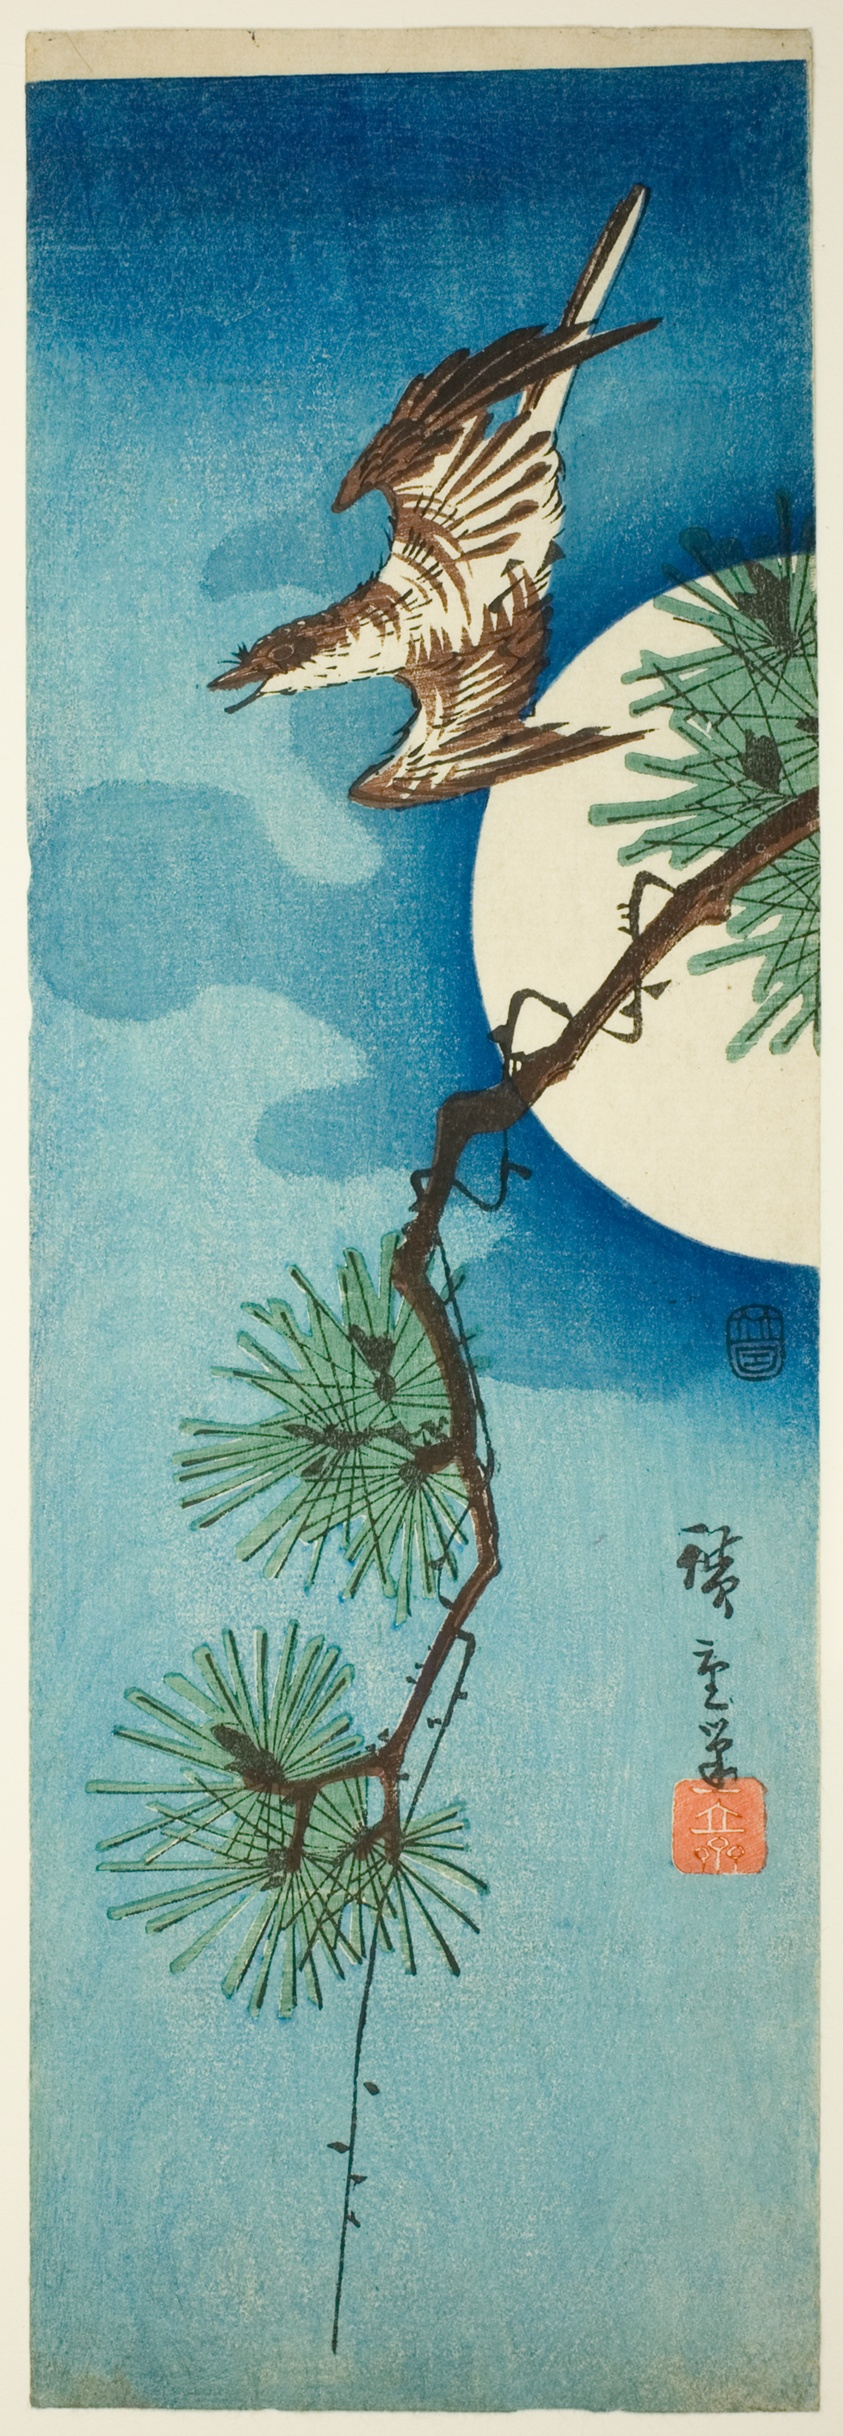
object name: Print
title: Cuckoo, pine branch, and full moon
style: Japanese (culture or style)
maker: Utagawa Hiroshige 歌川 広重; Japanese, 1797-1858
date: c. 1843/47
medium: Color woodblock print; aitanzaku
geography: Japan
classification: woodblock print; print; asian art